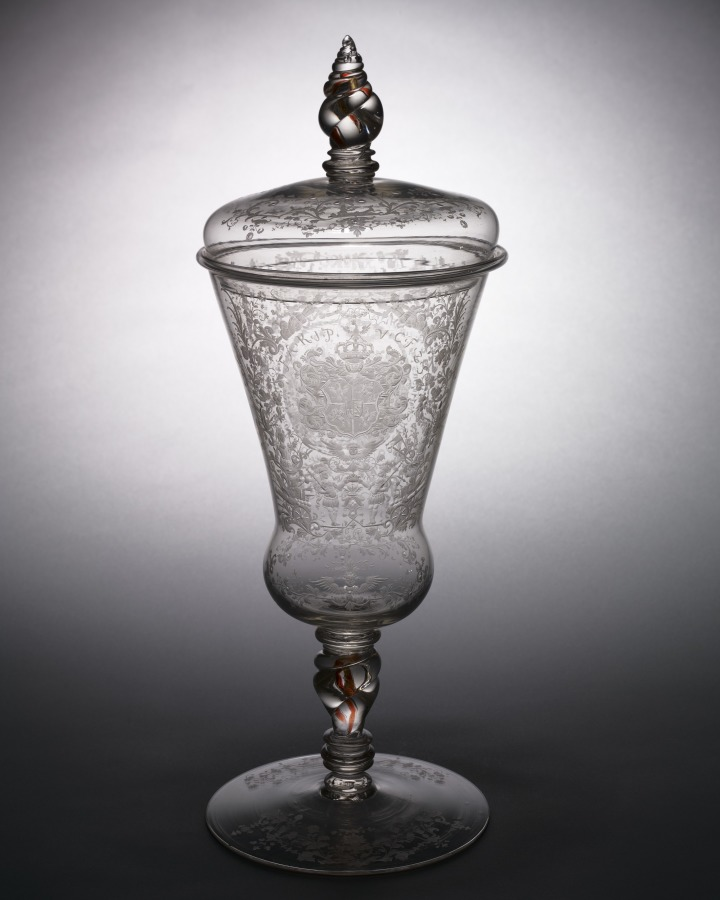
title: Standing Cup with Cover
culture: Bohemia, 18th century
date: c. 1715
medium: glass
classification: Glass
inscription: the German inscription engraved around the hunting scene translates as: When sorrow torments us enjoy a glass of wine and also the joy of a hunt; engraved on the opposite side: F.A.K.J.P.V.C.F.Z.S. (Friedrich August Keonig in Polen und Chur Fuerst zu Sachsen).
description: Engraved with arms of Saxony-Poland and Hunting Scene.